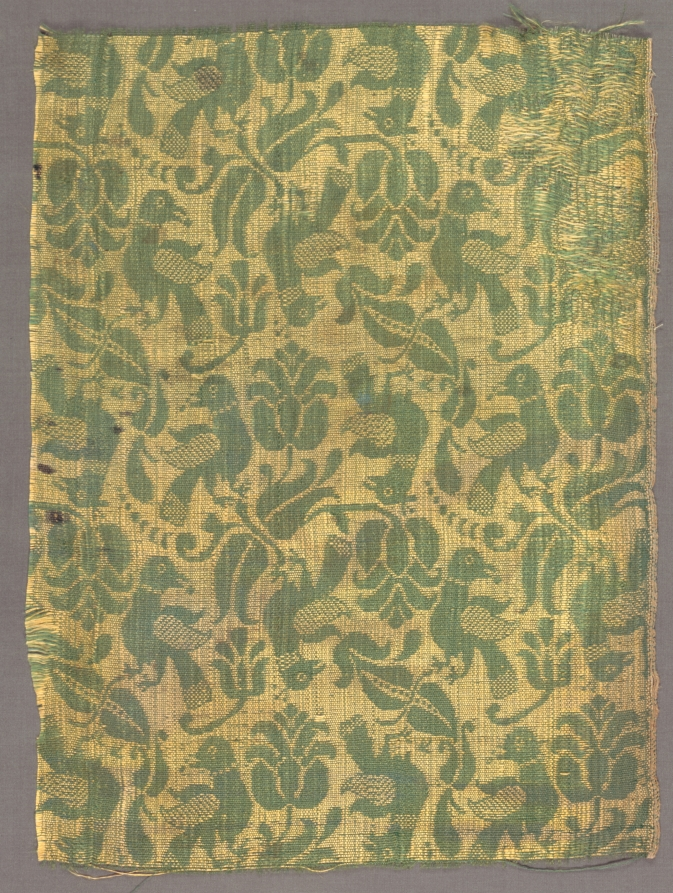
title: Fragment with Birds and Floral Motif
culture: Italy or Spain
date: early 1600s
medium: silk: damask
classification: Textile